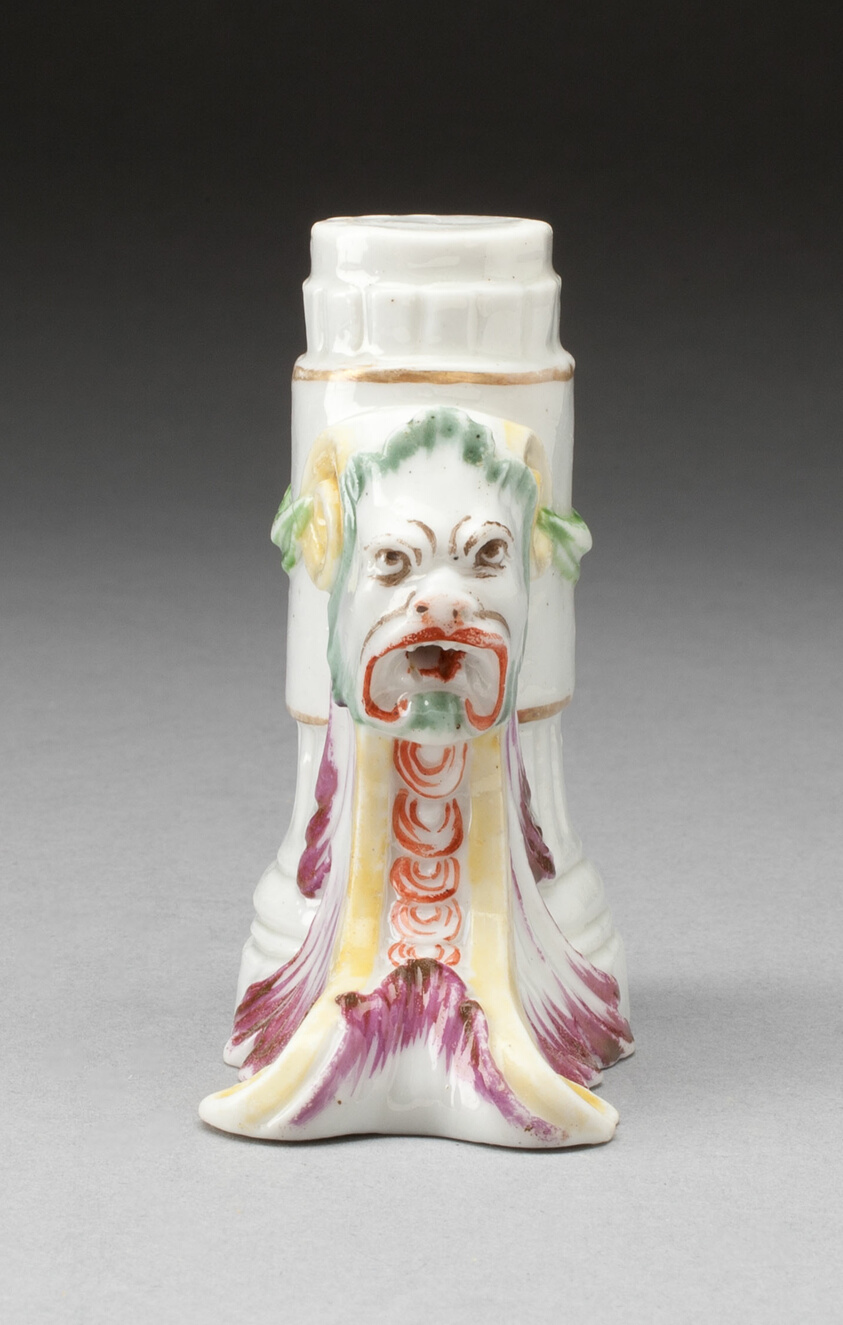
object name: Ceramics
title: Pedestal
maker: Italy, Venice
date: c. 1770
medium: Porcelain with polychrome enamels and gilding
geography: Venice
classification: porcelain; ceramics; european decorative arts